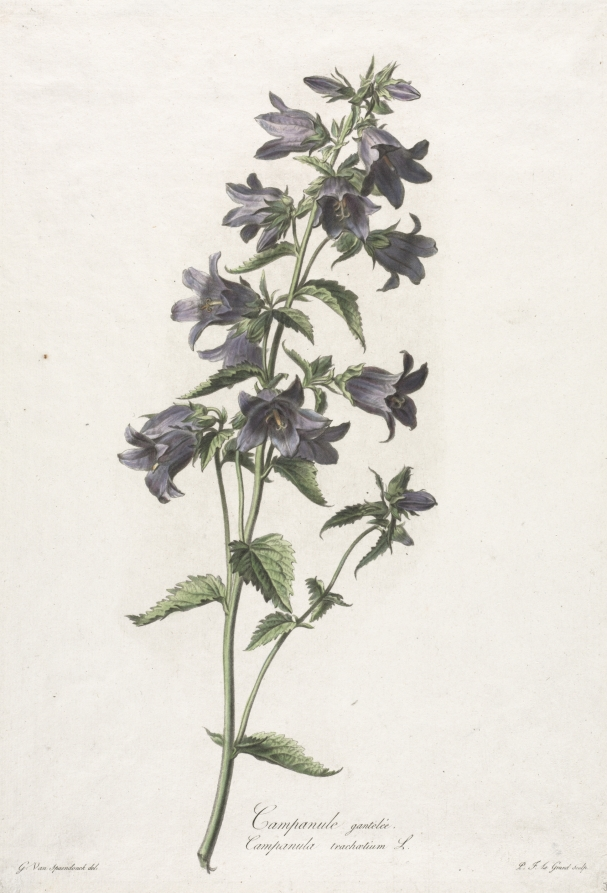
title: Fleurs dessinées d'après nature: Campanule gantelée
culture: Netherlands, late 18th-early 19th Century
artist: Gerard van Spaendonck (Dutch, 1746–1822)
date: c. 1800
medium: stipple engraving with roulette, hand-colored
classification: Print